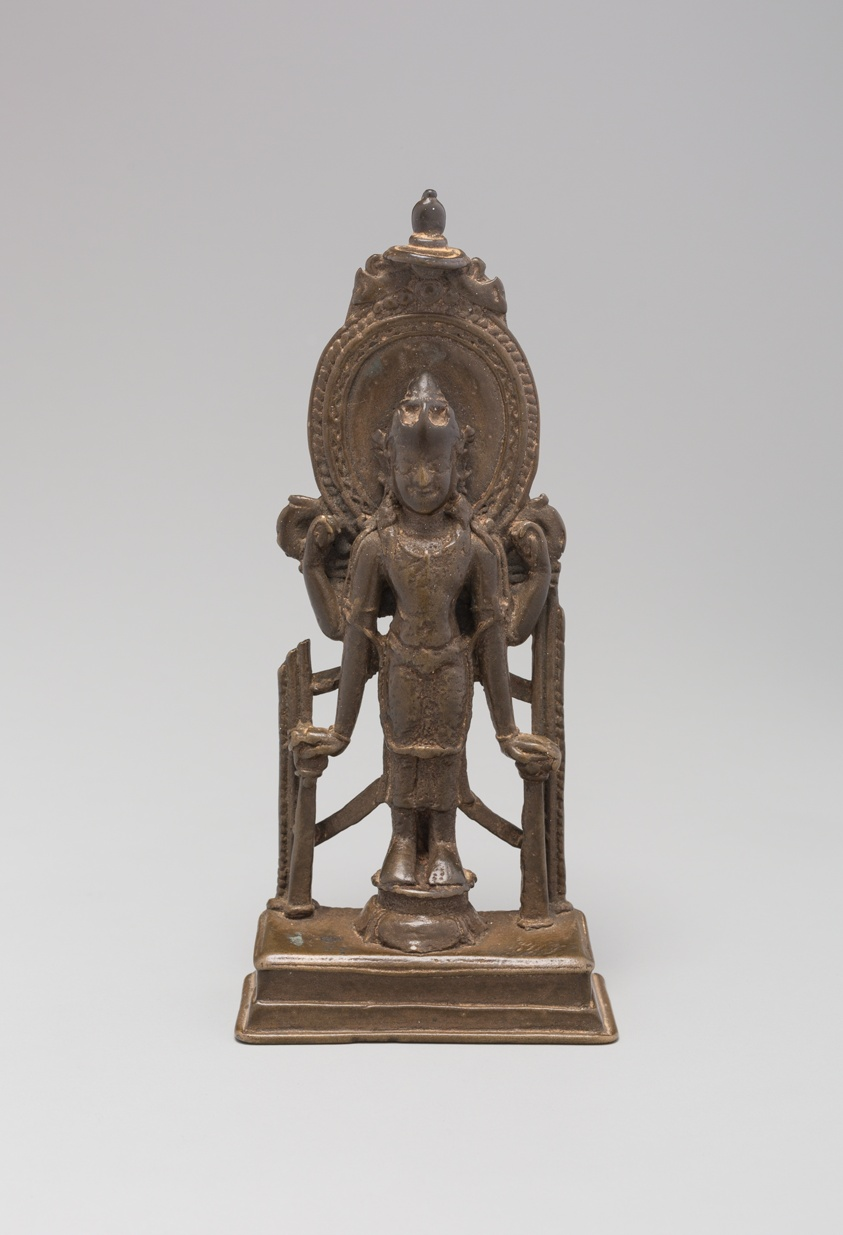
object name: Sculpture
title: God Vishnu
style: South Asian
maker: Bangladesh or Eastern India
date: c. 9th century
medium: Bronze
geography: Bangladesh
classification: bronze; metal; sculpture; asian art